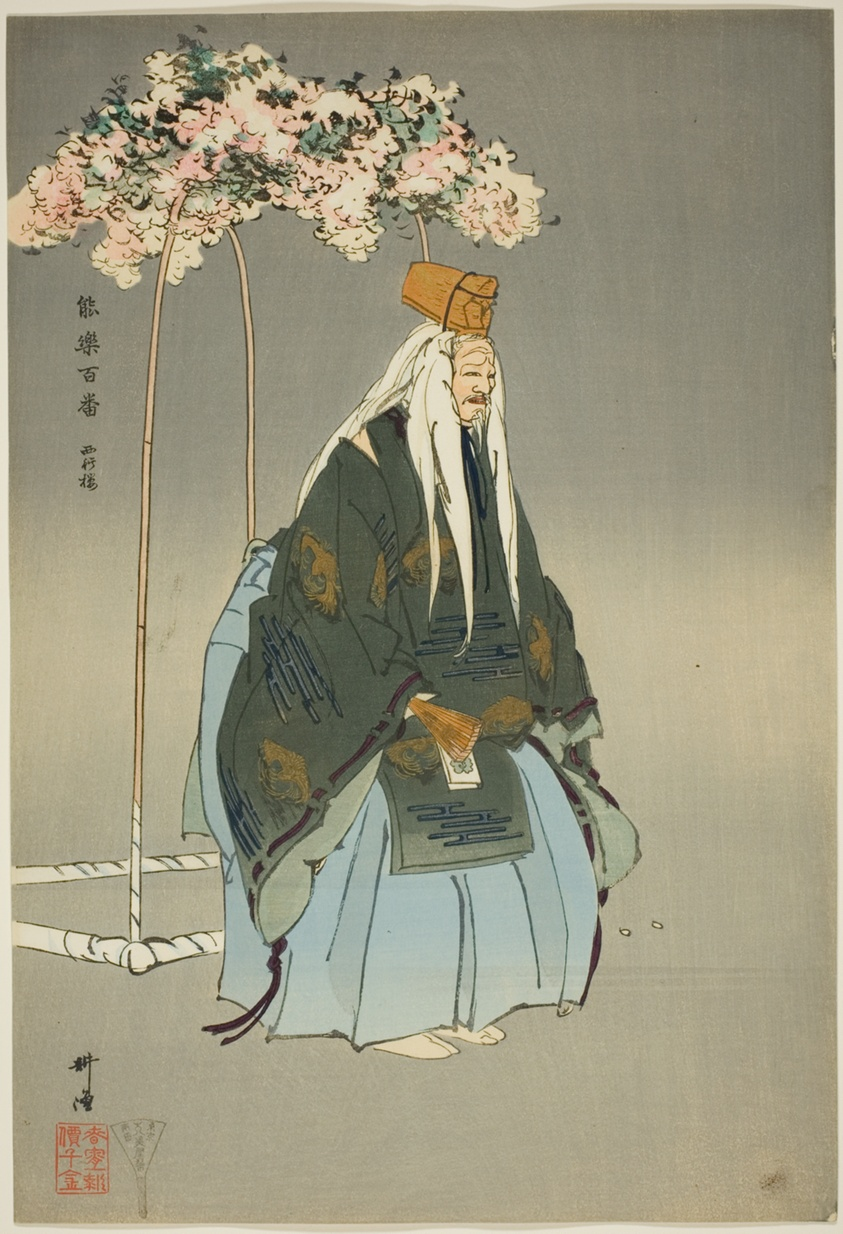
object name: Print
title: Saigyo-zakura, from the series "One Hundred No Dramas (Nogaku hyakuban)"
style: Japanese (culture or style)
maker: Tsukioka Kogyo; Japanese, 1869-1927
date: 1898/1903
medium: Color woodblock print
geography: Japan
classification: woodblock print; print; asian art